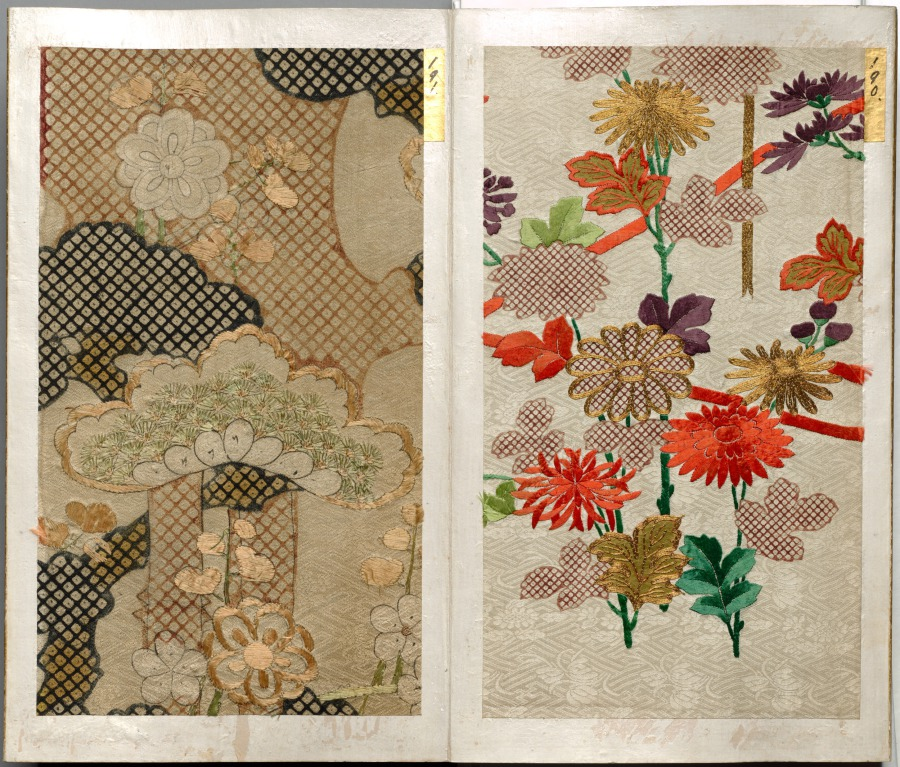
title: Album of Textile Samples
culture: Japan, Edo period (1615–1868)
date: 1600s-1700s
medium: silk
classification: Textile